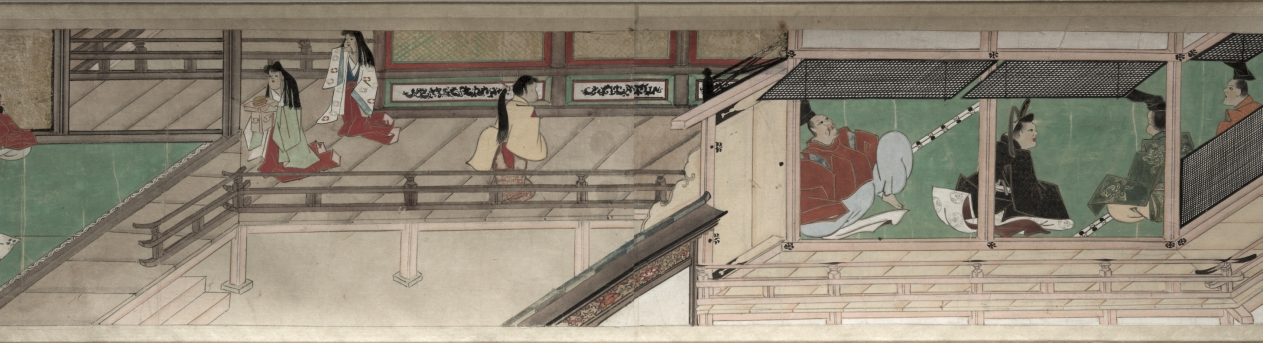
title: The Saltmaker's Story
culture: Japan, Edo period (1615–1868)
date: early 1600s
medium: One of a pair of handscrolls; ink, color, and gold on paper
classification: Painting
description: Once read and copied by girls at New Year’s celebrations and included in dowries, The Saltmaker’s Story is a rags-to-riches tale in which daughters are gifts from the gods. Despite his simple outlook, the main character progresses from humble roots as an associate at Kashima Shrine to the elite status of grandfather of the emperor through the intervention of the Kashima deity. The Saltmaker’s Story is traditionally presented in a set of three scrolls, but the text of this set has been removed by a previous owner, who remounted the illustrations as a pair. The paintings of this one take us from right to left through the second half of the tale.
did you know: This handscroll originally had texts before its paintings, but the texts were removed.